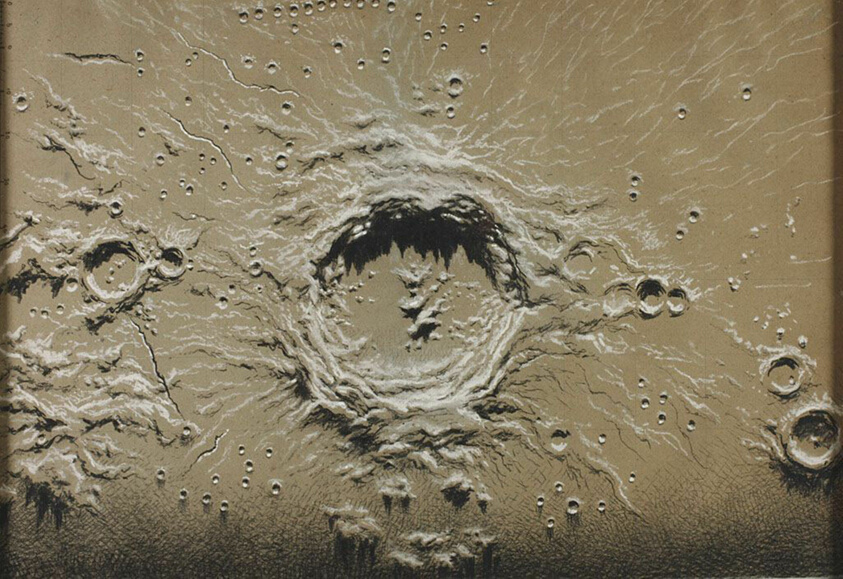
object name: Drawing and Watercolor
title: Copernicus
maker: James Nasmyth (Scottish, 1808-1890)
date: 1867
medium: Black and white chalk, graphite, touches of blue pencil, with scale in pen and brown ink, on gray wove paper with blue fibers, squared in graphite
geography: United Kingdom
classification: chalk; drawings (visual works); prints and drawing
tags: moon